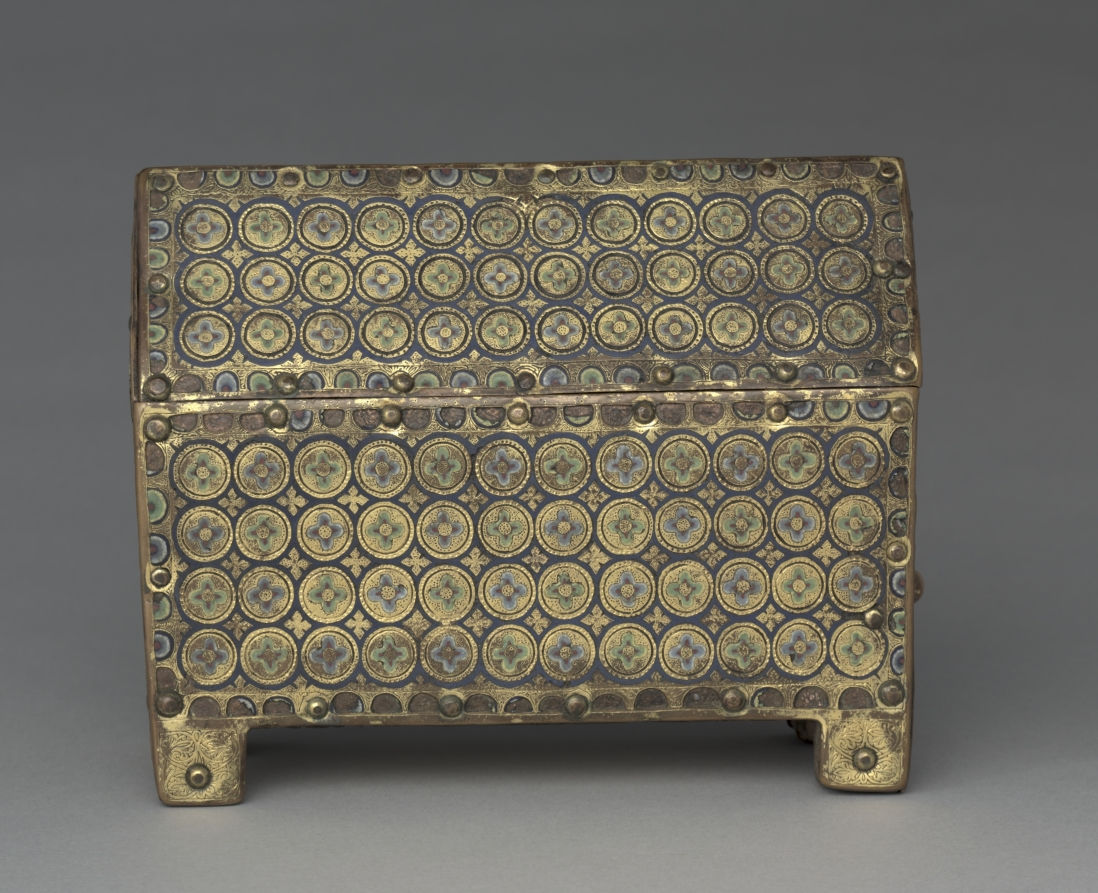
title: Chasse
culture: France, Limousin, Limoges, Gothic period, first half of 13th century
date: 1200–1250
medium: copper: gilded, engraved, chased; champlevé enamel; wood core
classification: Enamel